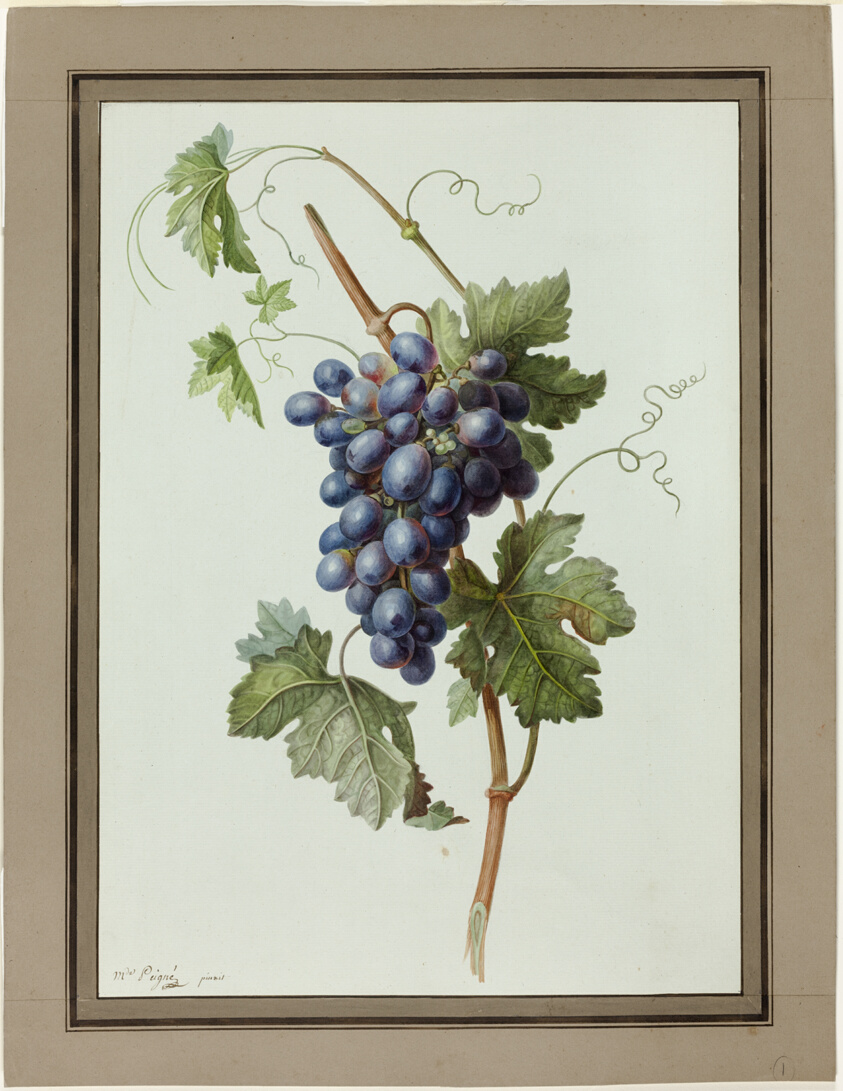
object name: Drawing and Watercolor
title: Study of a Bunch of Grapes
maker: Madame Peigné; French, active 1770, died 1815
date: 1790/1810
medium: Watercolor over black chalk on pale blue laid paper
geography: France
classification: watercolor; drawings (visual works); prints and drawing